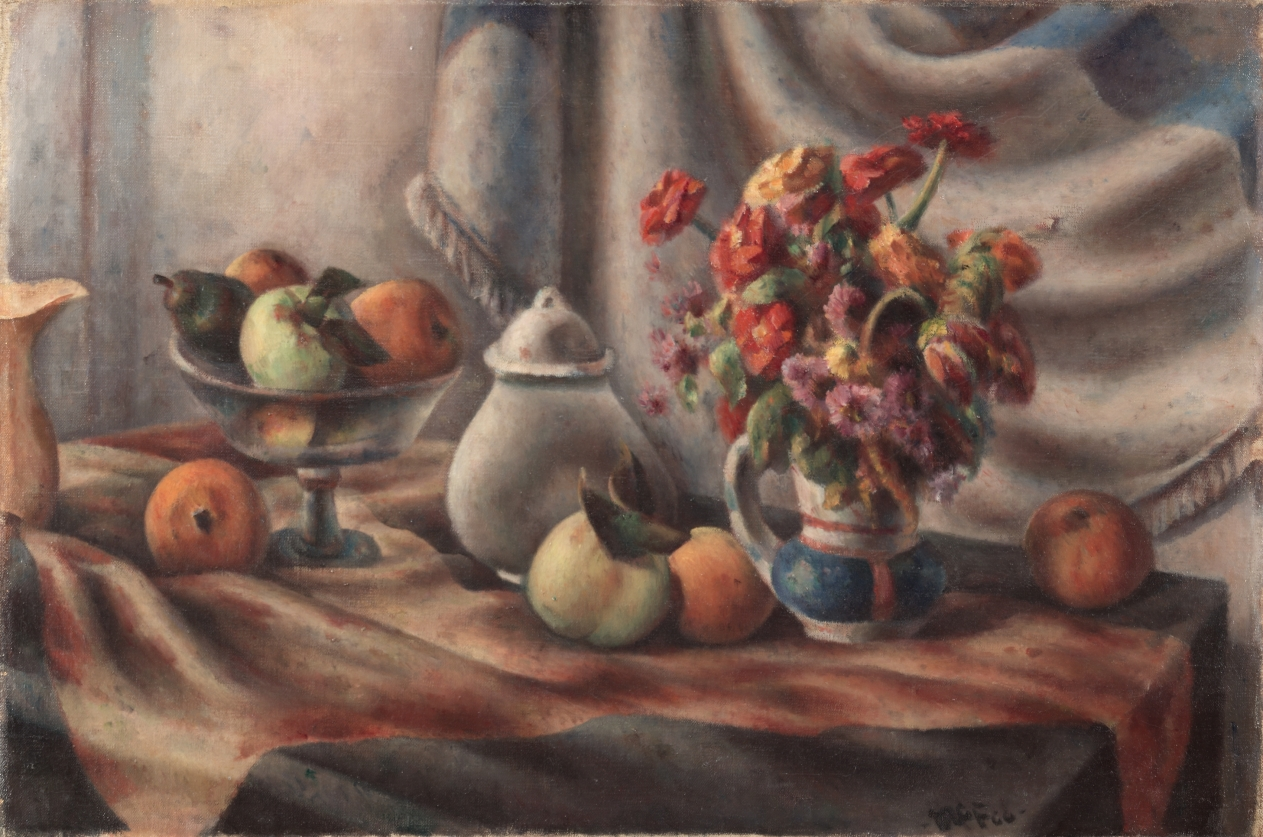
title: Fruits and Flowers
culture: America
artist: Henry Lee McFee (American, 1886–1953)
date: 1927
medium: oil on canvas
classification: Painting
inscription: signed lower right: McFee